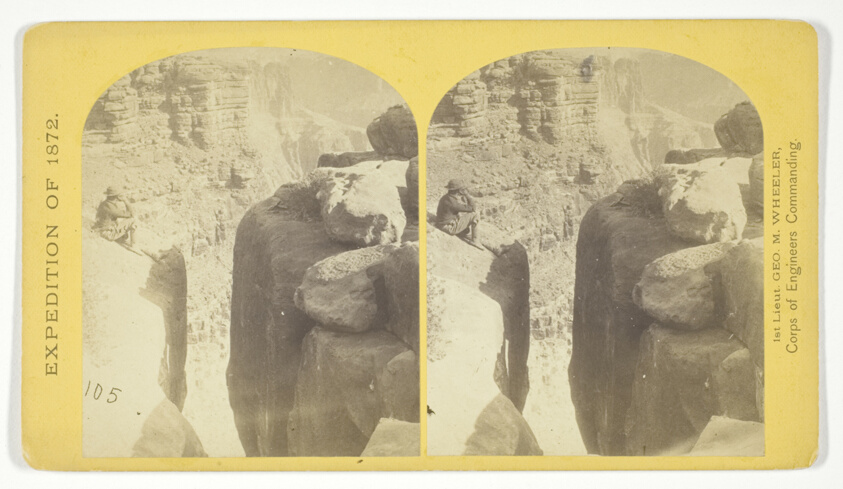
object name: Photograph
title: The northern wall of the Grand Cañon of the Colorado, near the foot of To-ro-weap valley. The rounded rocks of the foreground are sand-stone, No. 14 from the series "Geographical Explorations and Surveys West of the 100th Meridian"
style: 19th century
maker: William H. Bell (American, 1830–1910); commissioned by George Wheeler for the War Department, Corps of Engineers, U.S. Army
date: 1872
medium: Albumen print, stereo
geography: United States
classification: stereograph (albumen); photography; photograph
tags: Collected by Hugh Edwards, Geographical Explorations and Surveys